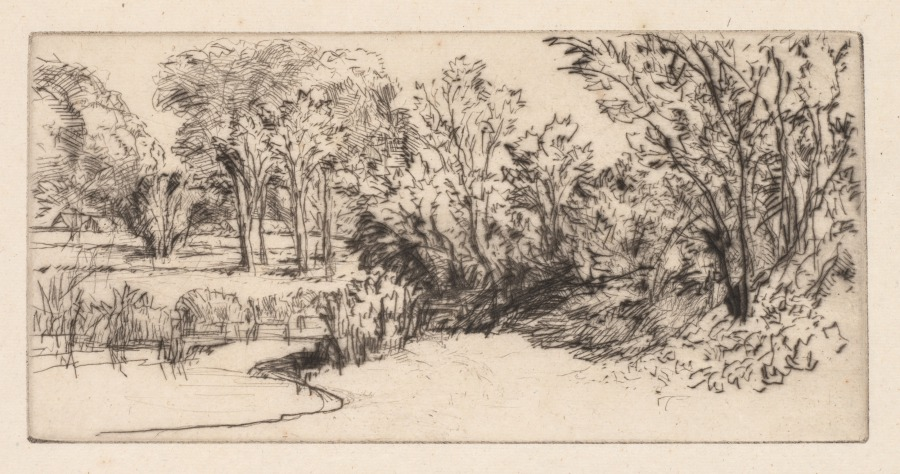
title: The Little Longparish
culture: Britain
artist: Francis Seymour Haden (British, 1818–1910)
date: 1896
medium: drypoint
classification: Print